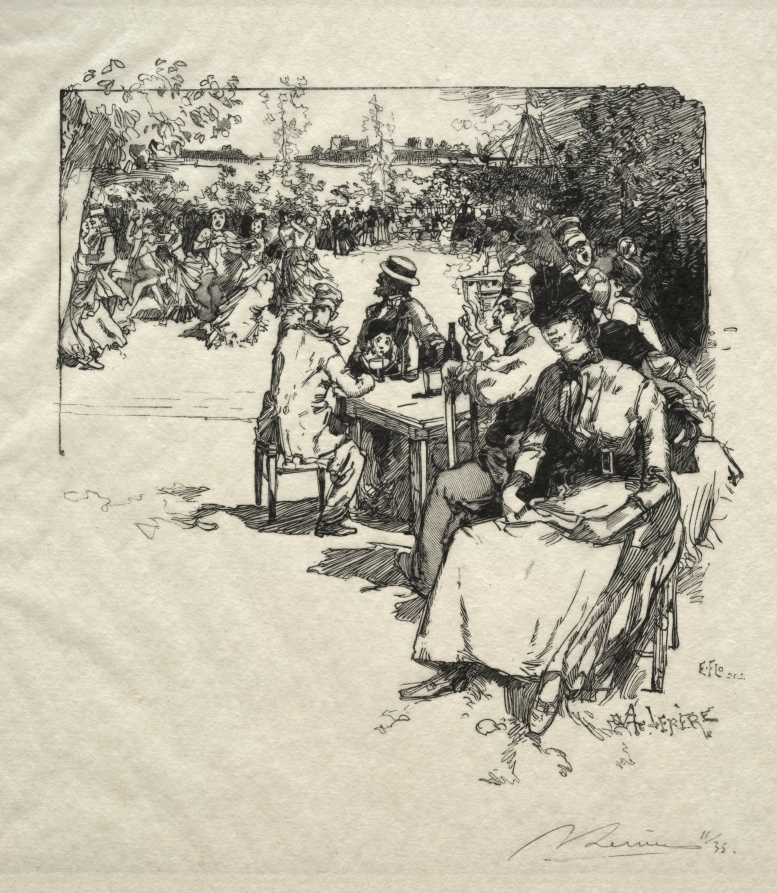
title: Bal au Point-du-Jour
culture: France, 19th-20th century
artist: Auguste Louis Lepère (French, 1849–1918)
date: 1886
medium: wood engraving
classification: Print